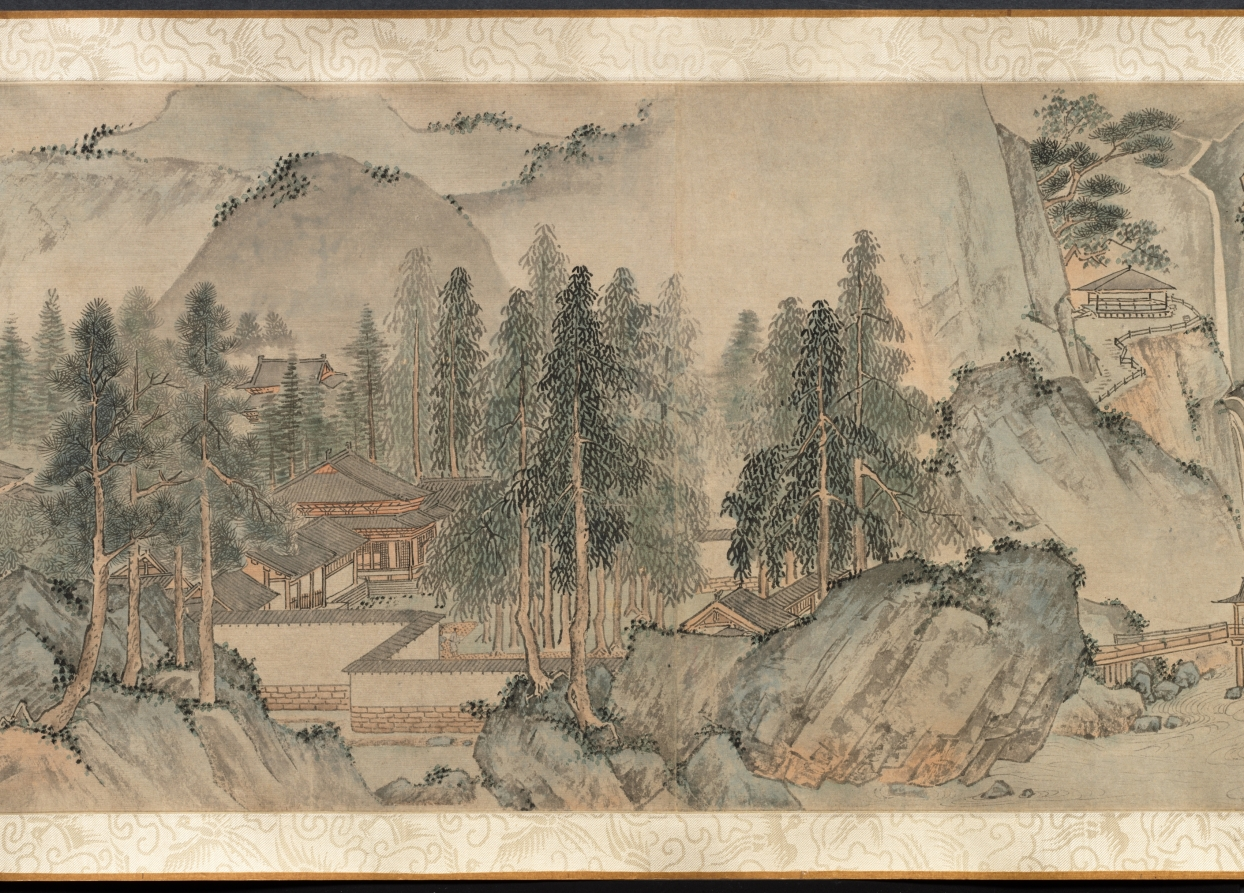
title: Ten Thousand Li of the Yangzi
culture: China, Ming dynasty (1368–1644)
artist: Dai Jin (Chinese, 1388–1462)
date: c. 1400s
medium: Handscroll; ink and color on paper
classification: Painting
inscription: Two colophons at end. Artist's seals: Dai Jin 戴進 and Wenjin 文進.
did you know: Dai Jin is traditionally considered the founder of the Zhe School, a style of landscape painting.